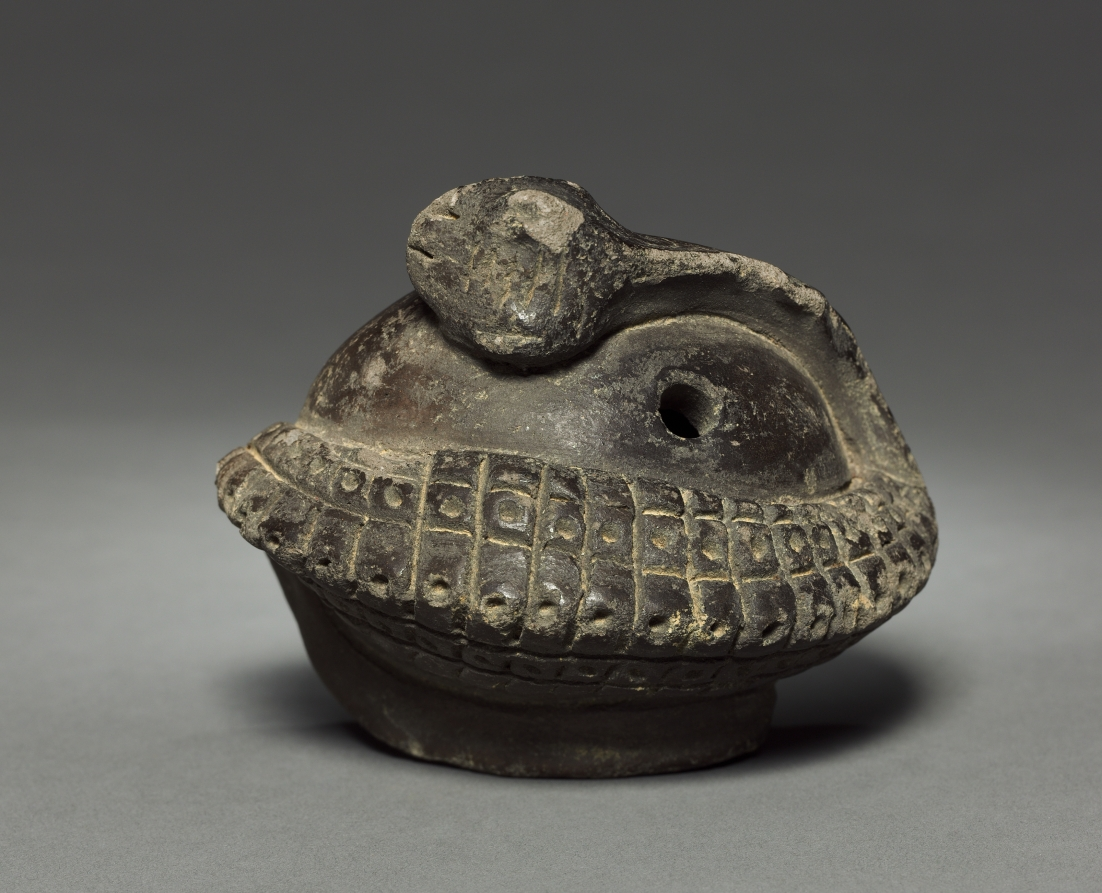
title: Coiled Snake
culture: Colombia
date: before 1921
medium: pottery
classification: Ceramic